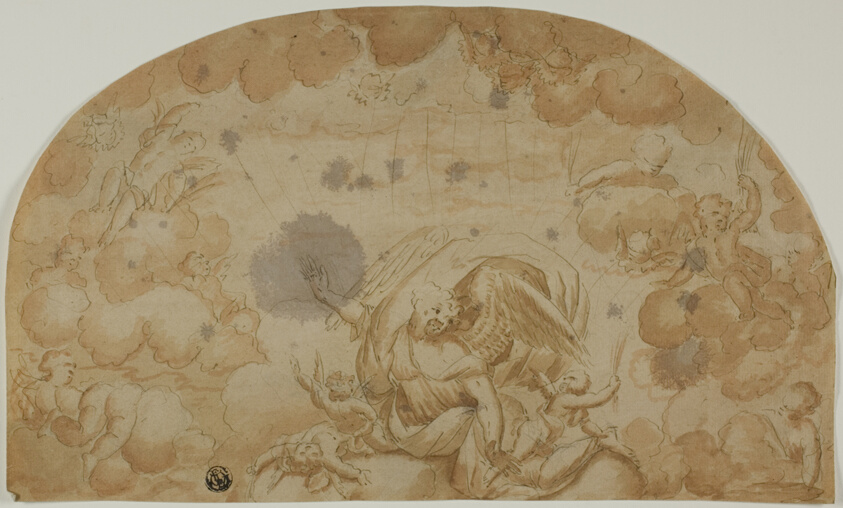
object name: Drawing and Watercolor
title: Celestial Scene with Angels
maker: Unknown Artist; European, 18th century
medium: Pen and brown ink, and brush and red chalk and brown wash, over touches of graphite, on lunette- shaped cream laid paper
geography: Germany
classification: pen and ink drawings; drawings (visual works); prints and drawing